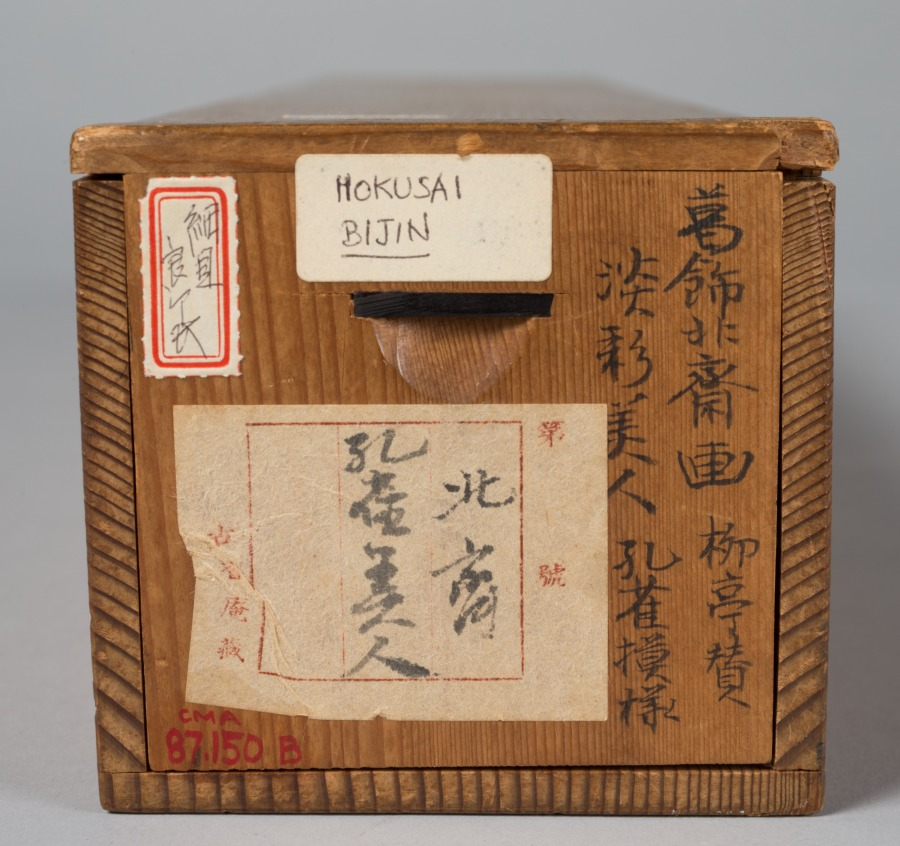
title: Beauty (Bijin)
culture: Japan, Edo period (1615–1868)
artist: Katsushika Hokusai (Japanese, 1760–1849)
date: c. 1775–1849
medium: hanging scroll; ink and color on paper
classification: Painting